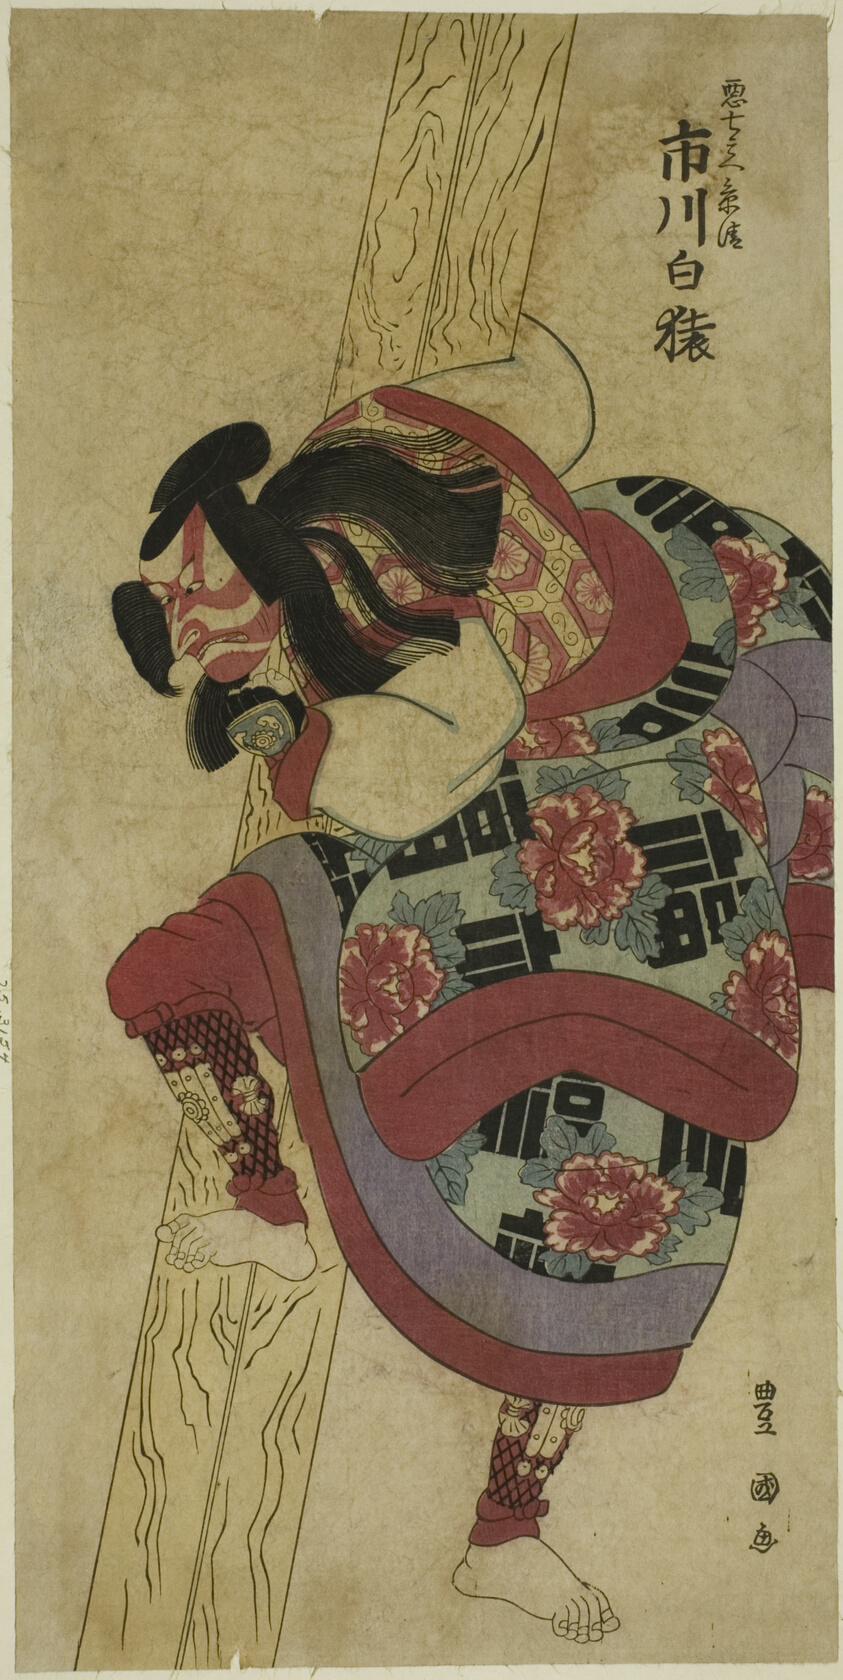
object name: Print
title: The actor Ichikawa Hakuen as Akushichibyoe Kagekiyo in the play "Hatsumonbi Yosooi Soga," performed at the Kawarazaki Theater in the first month, 1802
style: Japanese (culture or style)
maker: Utagawa Toyokuni I 初代 歌川 豊国; Japanese, 1769–1825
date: 1802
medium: Color woodblock print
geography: Japan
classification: woodblock print; print; asian art